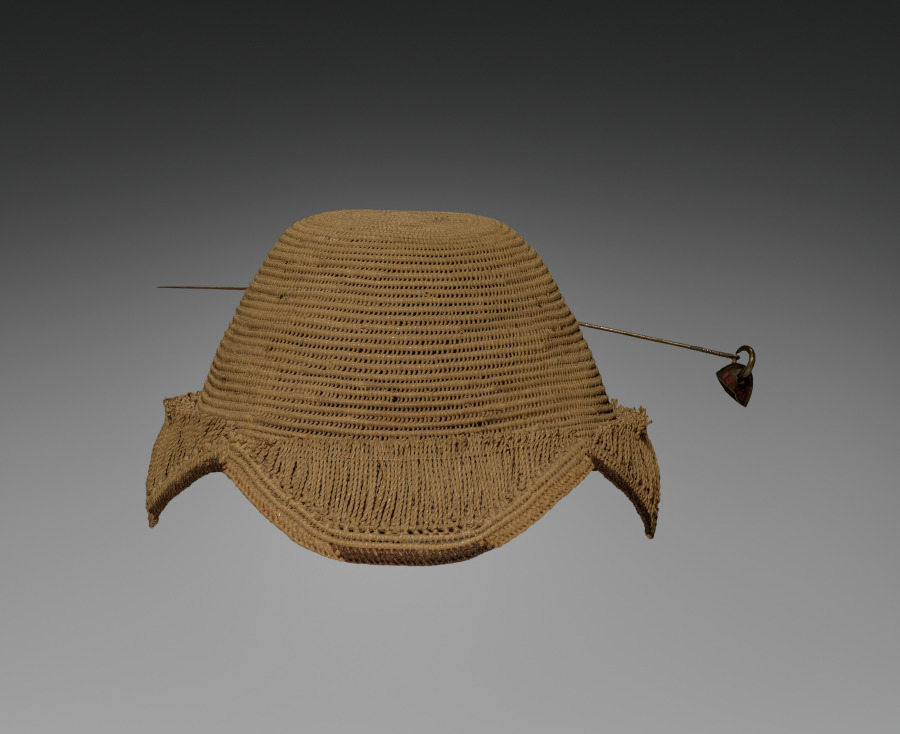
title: Hat (laket mishiing) with a pin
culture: Africa, Central Africa, Democratic Republic of the Congo, Kuba-style maker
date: early 1900s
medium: Raffia, metal, and dye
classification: Garment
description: Titled Kuba men and prominent women wear the laket, a small ornate dome-shaped hat. An essential fashion item of adult men in good social standing, it focuses special attention on the head as a significant marker of individual identity, ethnic affiliation, status, and role in society. This prestige object is secured on the crown of the head with a nine-and-a-half-inch metal pin that pierces through the hat onto a clump of hair. The laket is made from undyed raffia palm fiber that was then coiled into threads and woven. There are two examples of the laket: the plain type with the flat top, and the more elaborate type called the laket mishiing.